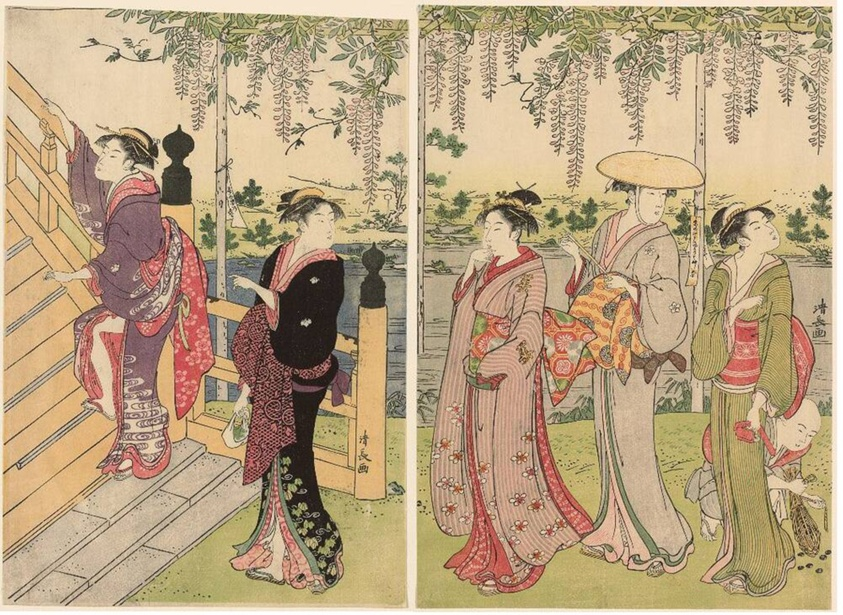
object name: Print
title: Admiring the wisteria at the Kameido Shrine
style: Japanese (culture or style)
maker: Torii Kiyonaga (Japanese, 1752-1815)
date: c. 1786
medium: Color woodblock print; oban diptych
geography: Japan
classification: woodblock print; print